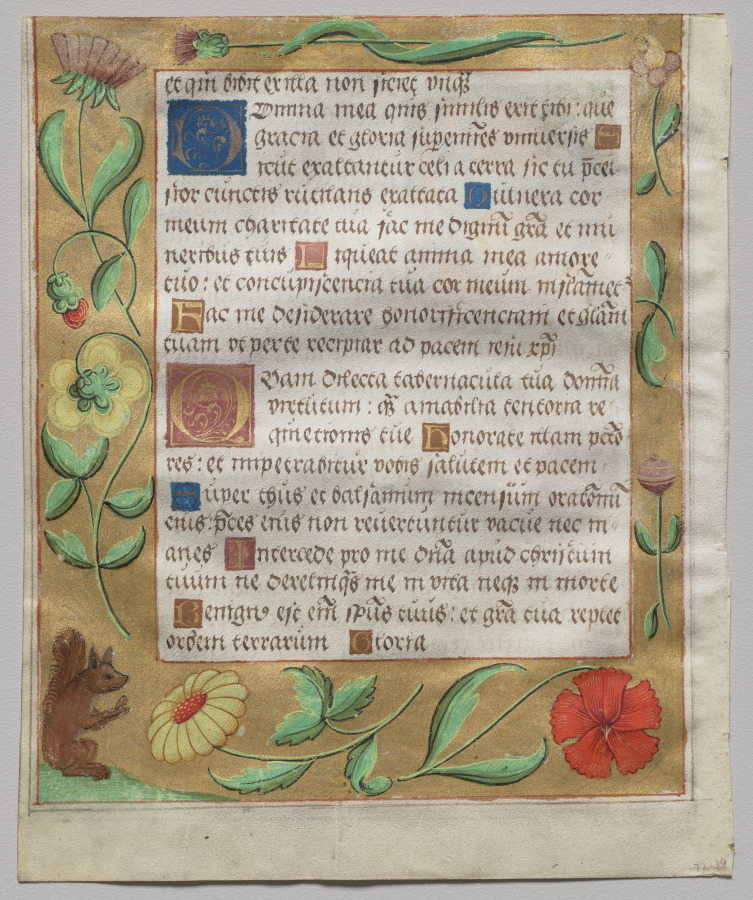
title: Leaf from a Psalter and Prayerbook: Ornamental Border with Flowers and Squirrel (verso)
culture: North Germany, Hildesheim (?), 16th century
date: c. 1524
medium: ink, tempera and liquid gold on vellum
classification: Manuscript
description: This leaf and the one nearby were excised from the same prayer book. They reveal the favored secular motifs that include decorations with animals, peasants, and domestic activities such as cooking. Here a woman is shown kneading bread. A composite text combining features of a psalter, a collection of psalms or religious verses, and a prayer book, it was used during Mass and other services. The original book was a highly personalized volume written and illuminated in or around the city of Hildesheim in Northern Germany, as suggested by the prominent inclusion of Saint Godehard, Bishop of Hildesheim (died 1038), in the calendar (not shown).